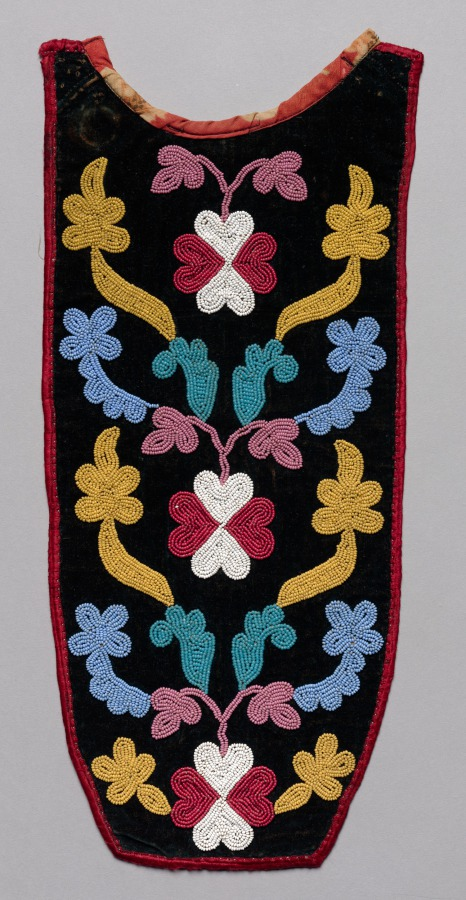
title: Placket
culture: Northeast Woodlands, Great Lakes Region, Anishinaabe (Ojibwe) or Nehiyawak (Cree) People?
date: late 1800s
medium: Velvet, cotton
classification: Garment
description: In the 1800s, native peoples began to use European fabrics to fashion fine formal garments; they favored sturdy cloth, such as velvet and wool broadcloth, which provided support for heavy decorative beadwork that was added by hand. Often the fabric was a dark color, providing dramatic contrast for the multicolored beads. Rather than encrusting the entire garment, beadwork was confined to cuffs, “epaulettes,” bib-like plackets and yokes, rectangular panels sewn to leggings, shirts, and dresses, and the like.